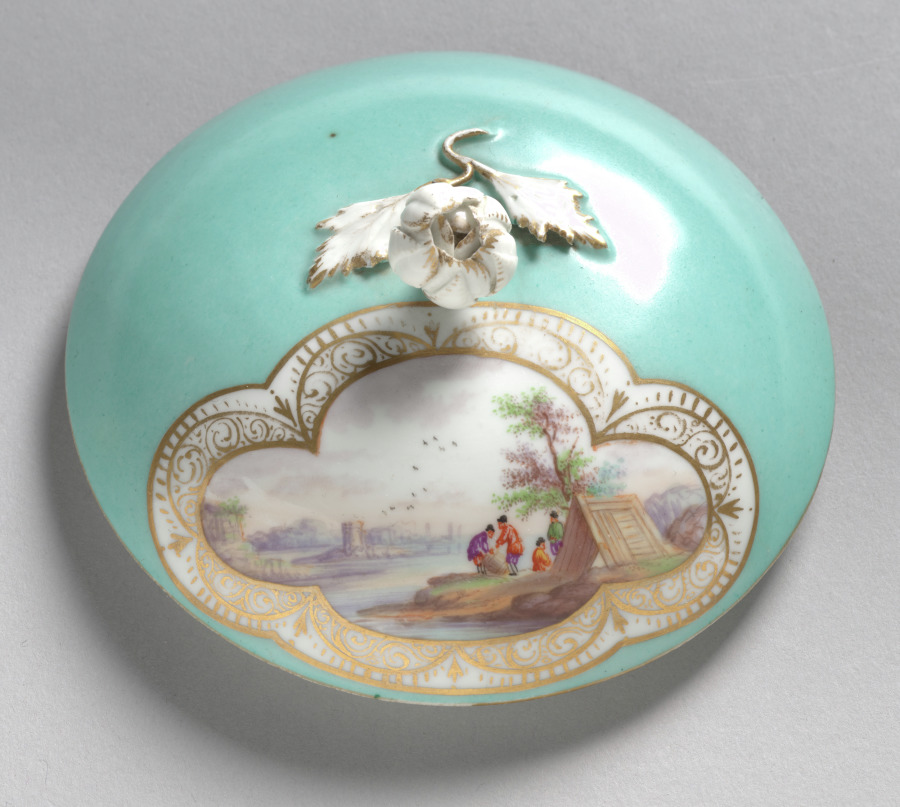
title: Cover for a Sugar Bowl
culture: Germany, Meissen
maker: Meissen Porcelain Factory (German, est. c. 1710)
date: c. 1750–70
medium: porcelain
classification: Ceramic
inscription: Half moon mark on the bottom.